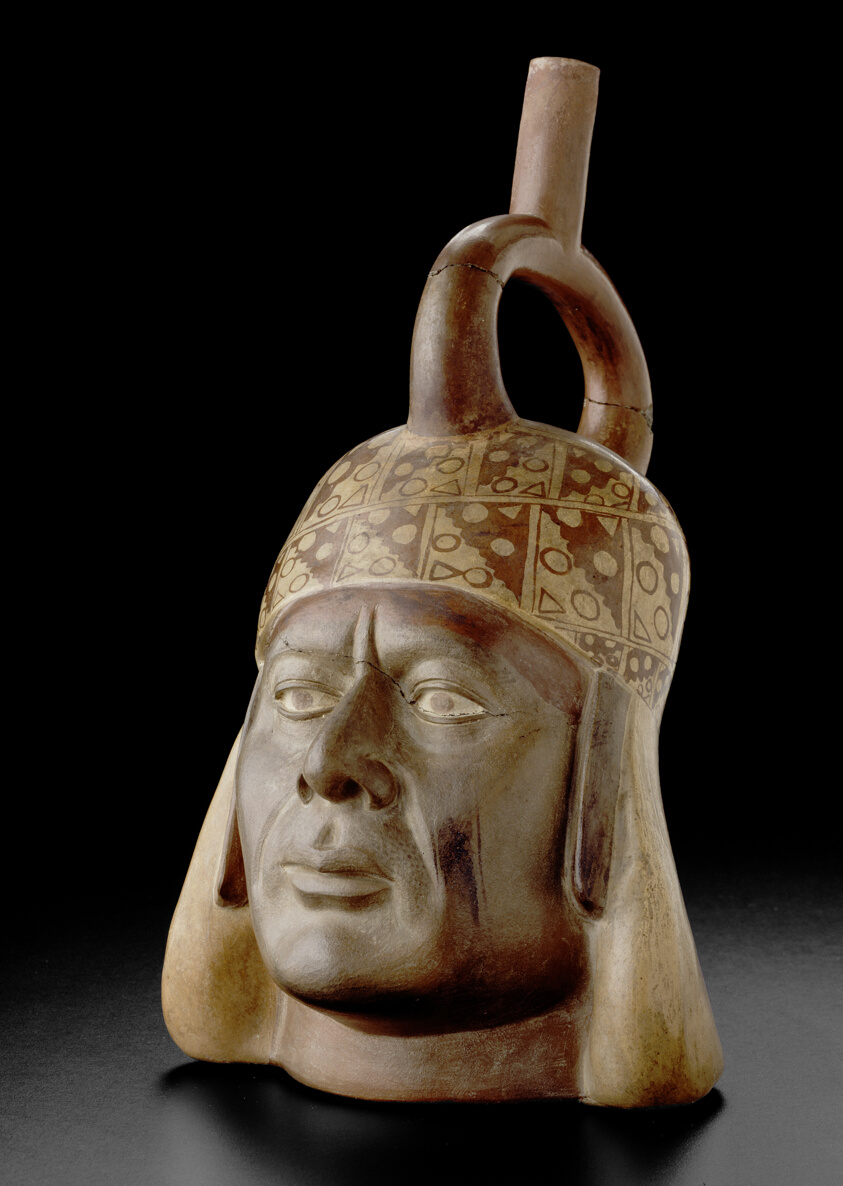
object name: Vessel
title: Portrait Vessel of a Ruler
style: moche, mochica v, mochica, early intermediate period, Pre-Columbian, americas, andes, Arts of the Americas, andean, south american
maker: Moche (North coast, Peru)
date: 100 BCE–500 CE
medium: Ceramic and pigment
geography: Peruvian North Coast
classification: ceramics; earthenware; art of the americas; vessel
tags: people, men, indigenous, red (color), geometric, heads, headwear, portraits, headdresses, rulers (people)